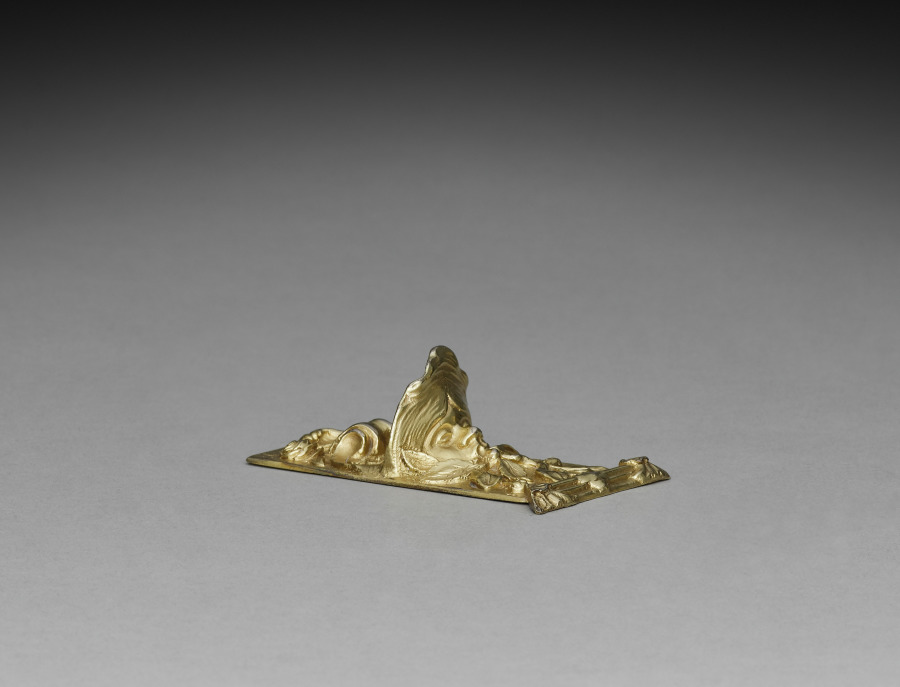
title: Tea Caddy (lid)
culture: England, London, 18th century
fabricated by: Paul Jacques de Lamerie (British, 1688–1751)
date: 1741–1742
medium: silver gilt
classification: Silver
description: In the 1600s and 1700s, silver played a significant role in projecting wealth, status, power, and ritual in British life. Tea was likewise a highly valued commodity, and as such, silver caddies were designed to display the social distinction of its owner. The prominently sloping shoulders of this lid's accompanying canister were designed by Paul Jacques de Lamerie in the early 1730s and became a standard form for tea caddies by the end of the decade.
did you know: This is the lid to a tea caddy. See cover record.